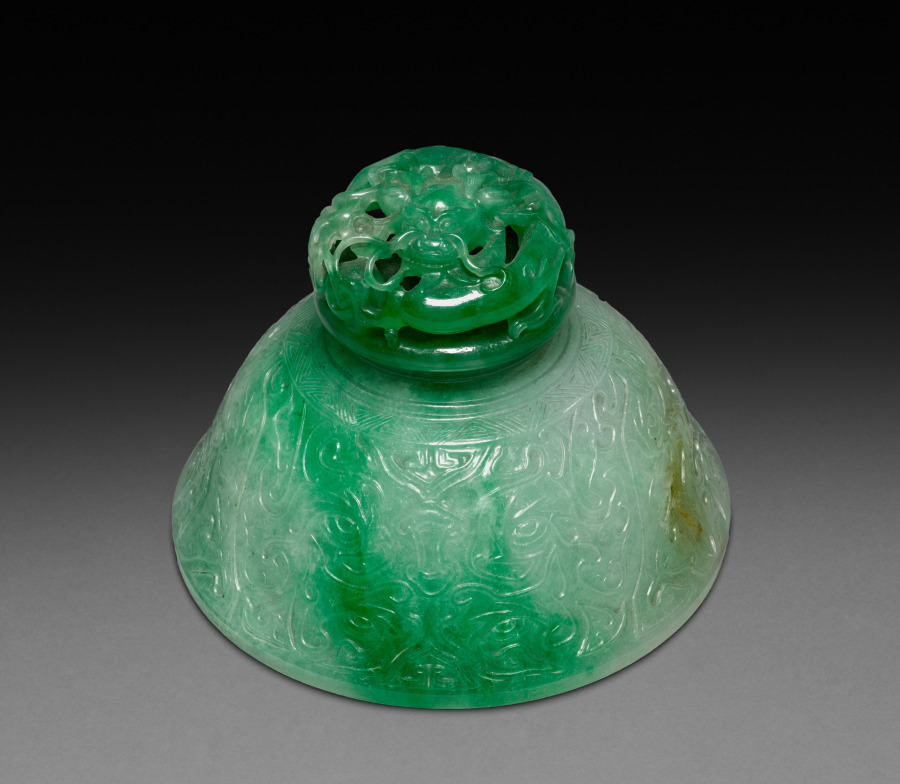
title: Incense Burner (lid)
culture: China, Qing dynasty (1644–1911), Qianlong reign (1736–95)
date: 1736–95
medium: jade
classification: Jade